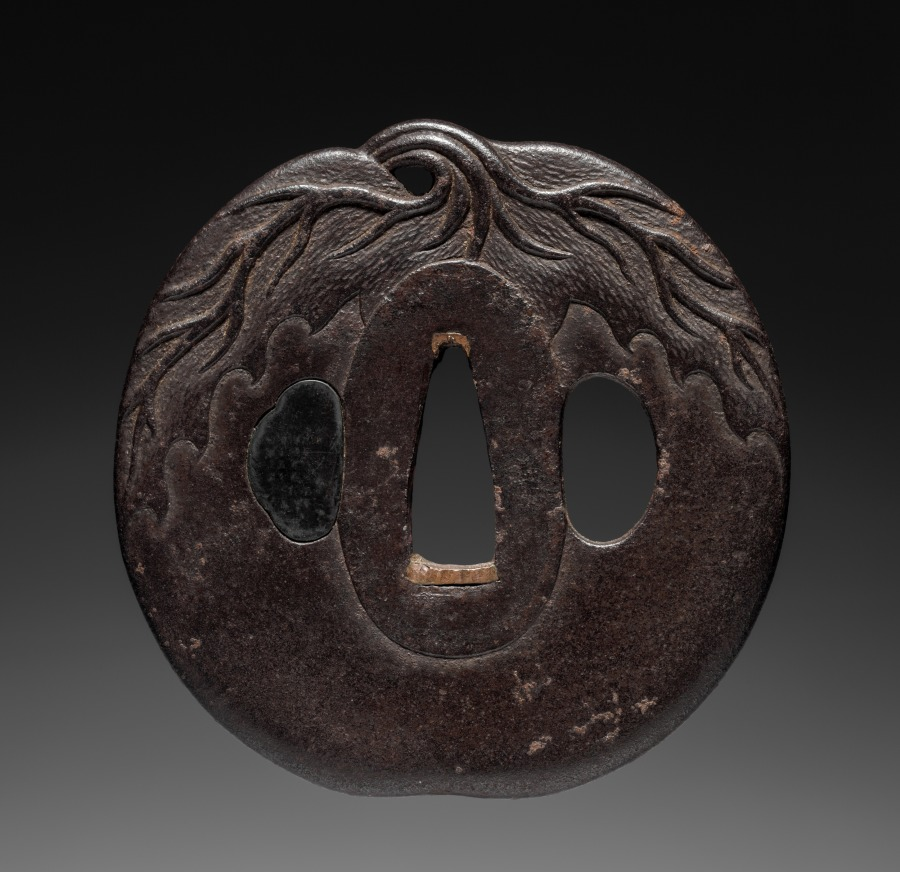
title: Sword Guard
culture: Japan, Edo period (1615–1868)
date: early 1800s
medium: iron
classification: Arms and Armor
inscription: Signature: Kinai, residing in Echizen (province), made